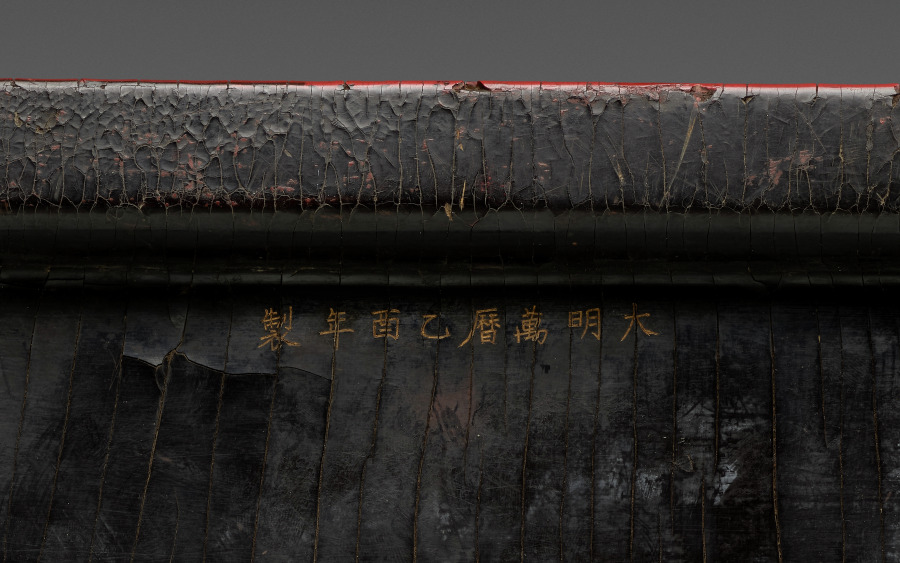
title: Tihong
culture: China, Ming dynasty (1368-1644), Wanli reign (1572-1620)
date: 1585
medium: carved cinnabar lacquer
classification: Lacquer